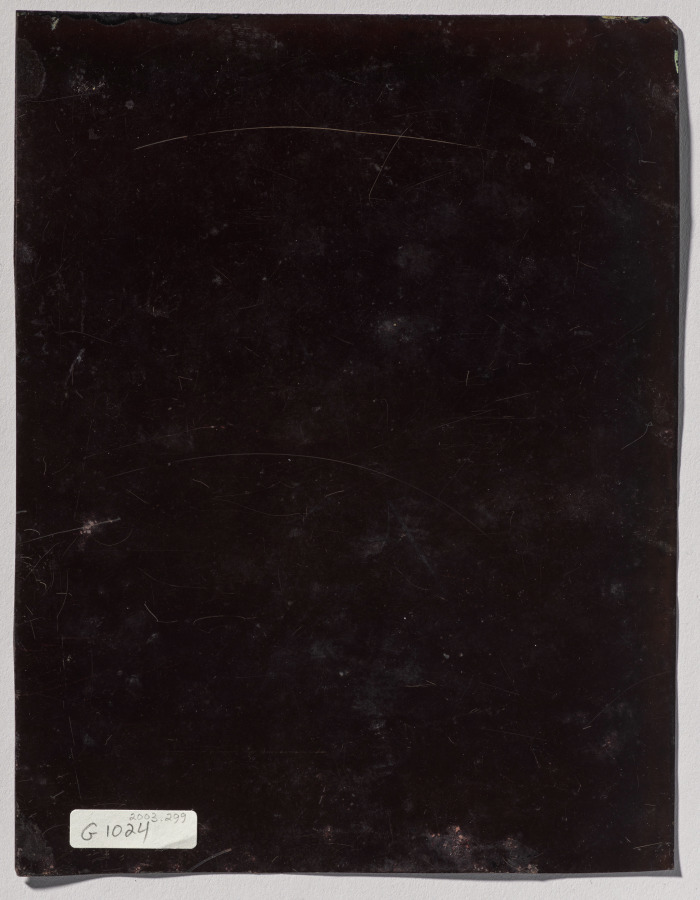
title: The Hold-Up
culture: American, 19th century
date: 1880s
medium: tintype, whole plate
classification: Photograph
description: Since the beginning of photography, objects and people have been purposefully arranged, or staged, for the camera. Popular in the late 1860s and 1870s, tintypes offered low prices and shortened exposure times. Perhaps because tintypists commonly worked at fairs and carnivals, frivolous images, such as this staged hold-up, became common. In these fictional scenes, all the participants were in on the joke. Some such scenes may be novelties, others may be gag portraits commissioned by groups of friends.